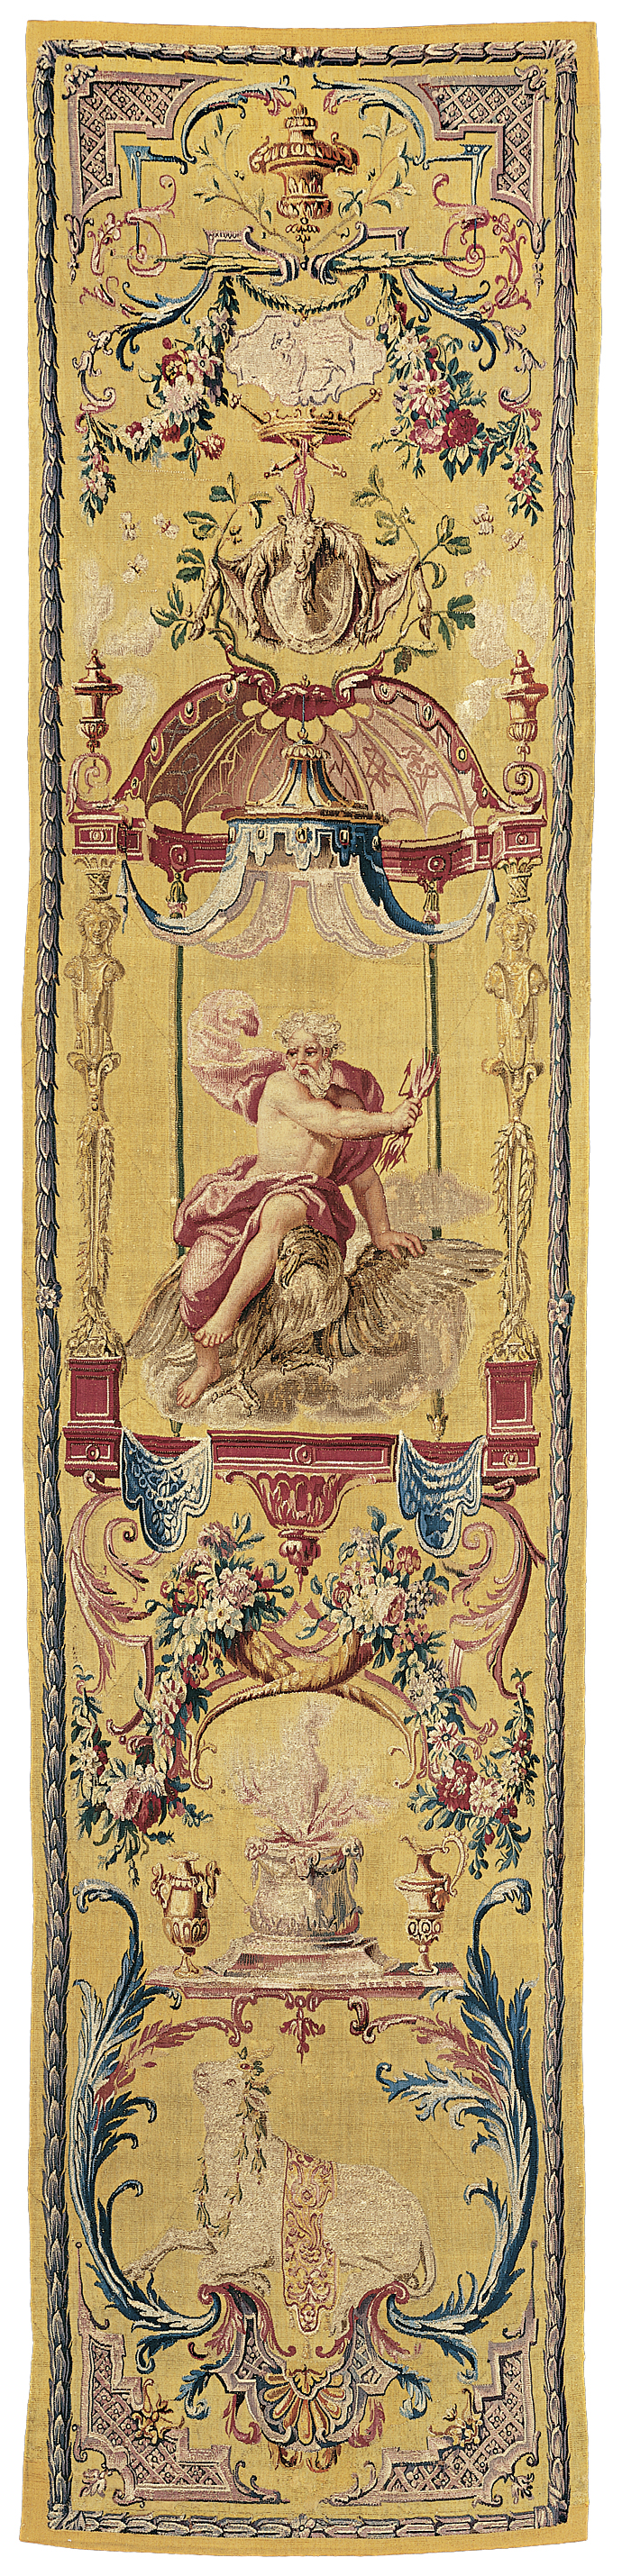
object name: Textile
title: The Month of July/The Sign of Leo, from The Grotesque Months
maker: After a design by Claude III Audran (1658–1734), 1708–09; Woven at the Manufacture Royale des Gobelins; France, Paris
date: c. 1726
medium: Wool and silk, slit and double interlocking tapestry weave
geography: Paris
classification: weaving - tapestry; textile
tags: gods (deities), acanthus, bearded man, calendars, cartouches, clouds, crowns, eagles, garlands, goats, lions, smoke, urns